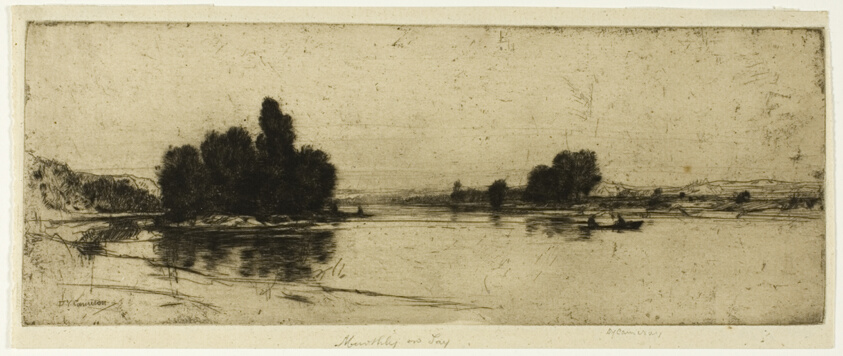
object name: Print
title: Murthly on the Tay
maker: David Young Cameron (Scottish, 1865-1945)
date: 1905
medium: Etching and drypoint on ivory laid paper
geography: Scotland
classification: etching; print; prints and drawing